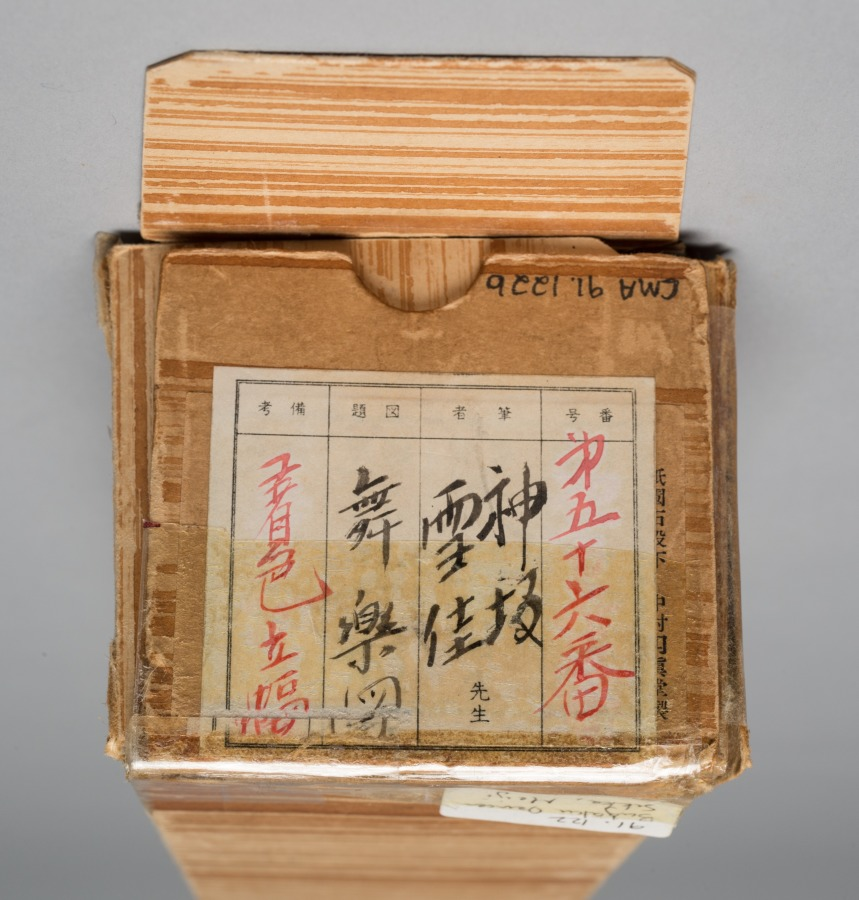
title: Bugaku Dancer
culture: Japan, Meiji period (1868–1912) to Shōwa period (1926–89)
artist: Kamisaka Sekka (Japanese, 1866–1942)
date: c. 1890–1942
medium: hanging scroll; ink and color on silk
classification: Painting